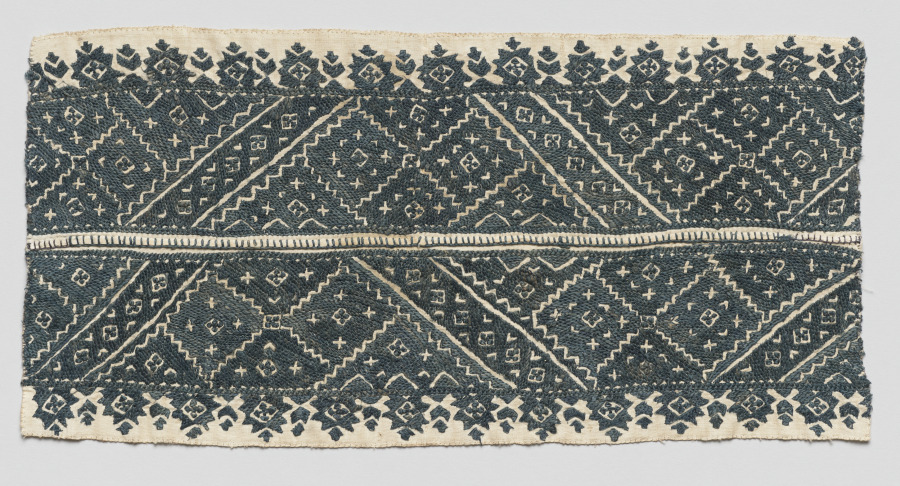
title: Fragment of a furnishing textile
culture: Africa, North Africa, Morocco, Fes, Moroccan embroiderer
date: 1800s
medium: Cotton, silk, dye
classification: Embroidery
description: The dense blue embroidery on this fragment is associated with the city of Fes, and was likely part of a larger textile used to decorate the interior of a Moroccan home. It might have been used as a cover for a pillow or low sofas lining the walls of a sitting room. Historically, some of these textiles were described as "Aleuj" (a pejorative term loosely translating to 'convert') and thought to be made by Circassian women from the Caucasus region in western Asia.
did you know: This textile was purchased in 1933 from the "A Century of Progress International Exposition," better known as the Chicago World's Fair.